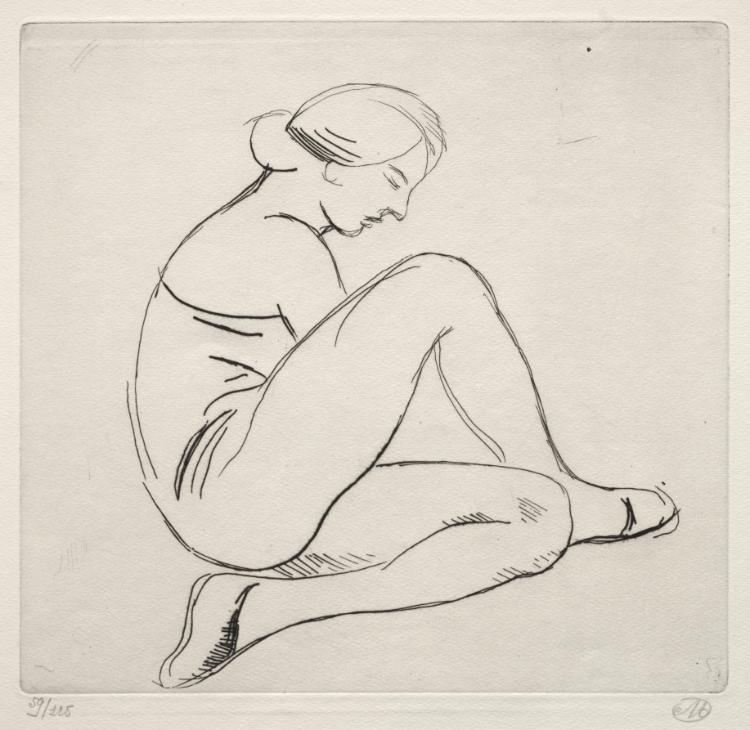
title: Femme Assise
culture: France, 20th century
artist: Aristide Maillol (French, 1861–1944)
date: c. 1900–1944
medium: etching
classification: Print